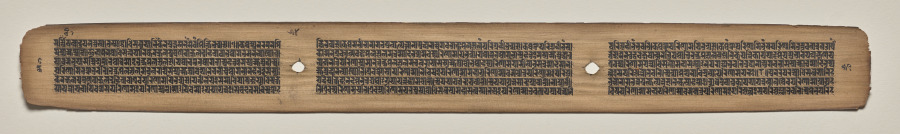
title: Text, folio 54 (verso), from a Manuscript of the Perfection of Wisdom in Eight Thousand Lines (Ashtasahasrika Prajnaparamita-sutra)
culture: Eastern India, Bihar, Vikramashila Monastery. Painting: Nepal, Kathmandu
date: Sunday, September 14, 1119 (year 239 of the Newar Samvat in the month of Ashvina)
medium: gum tempera and ink on palm leaves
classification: Painting